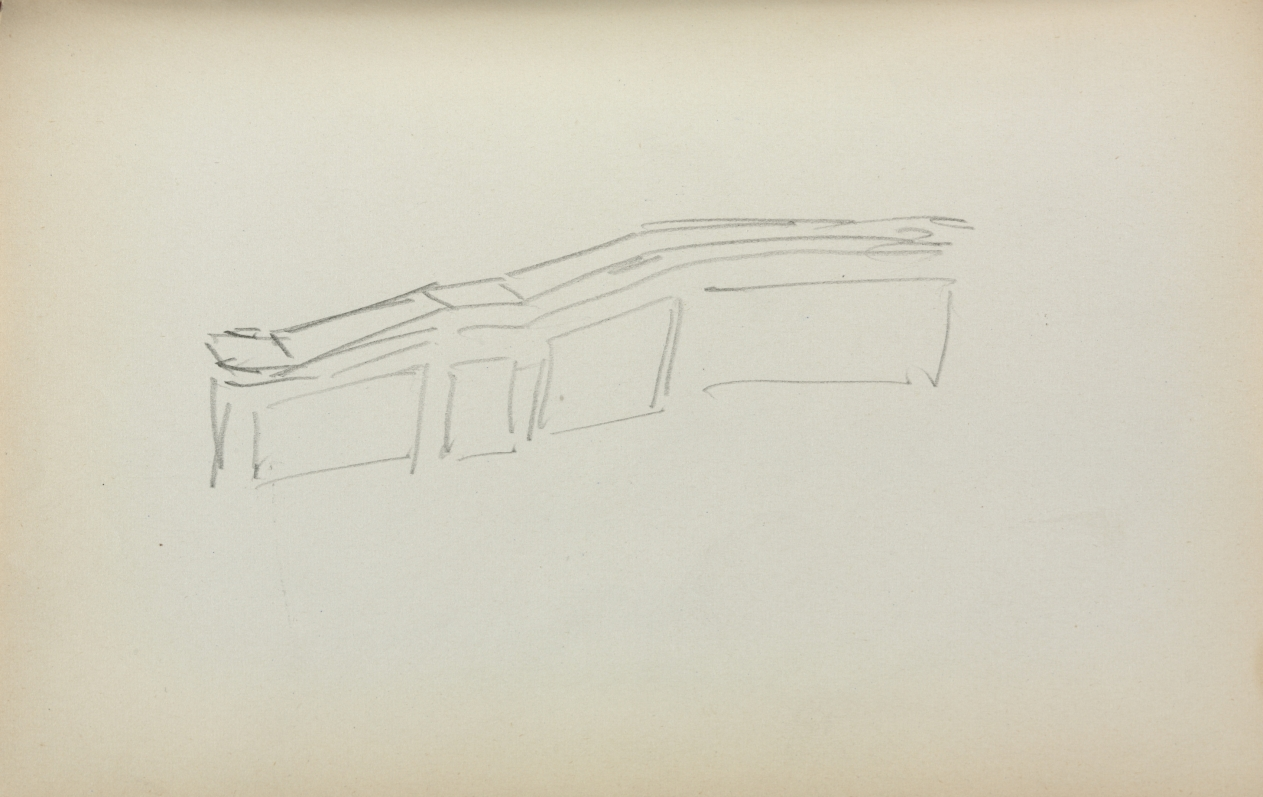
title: Italian Sketchbook: Squares and Rectangles (page 59)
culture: America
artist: Maurice Prendergast (American, born Newfoundland [now Canada], 1858–1924)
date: 1898–1899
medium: pencil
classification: Bound Volume